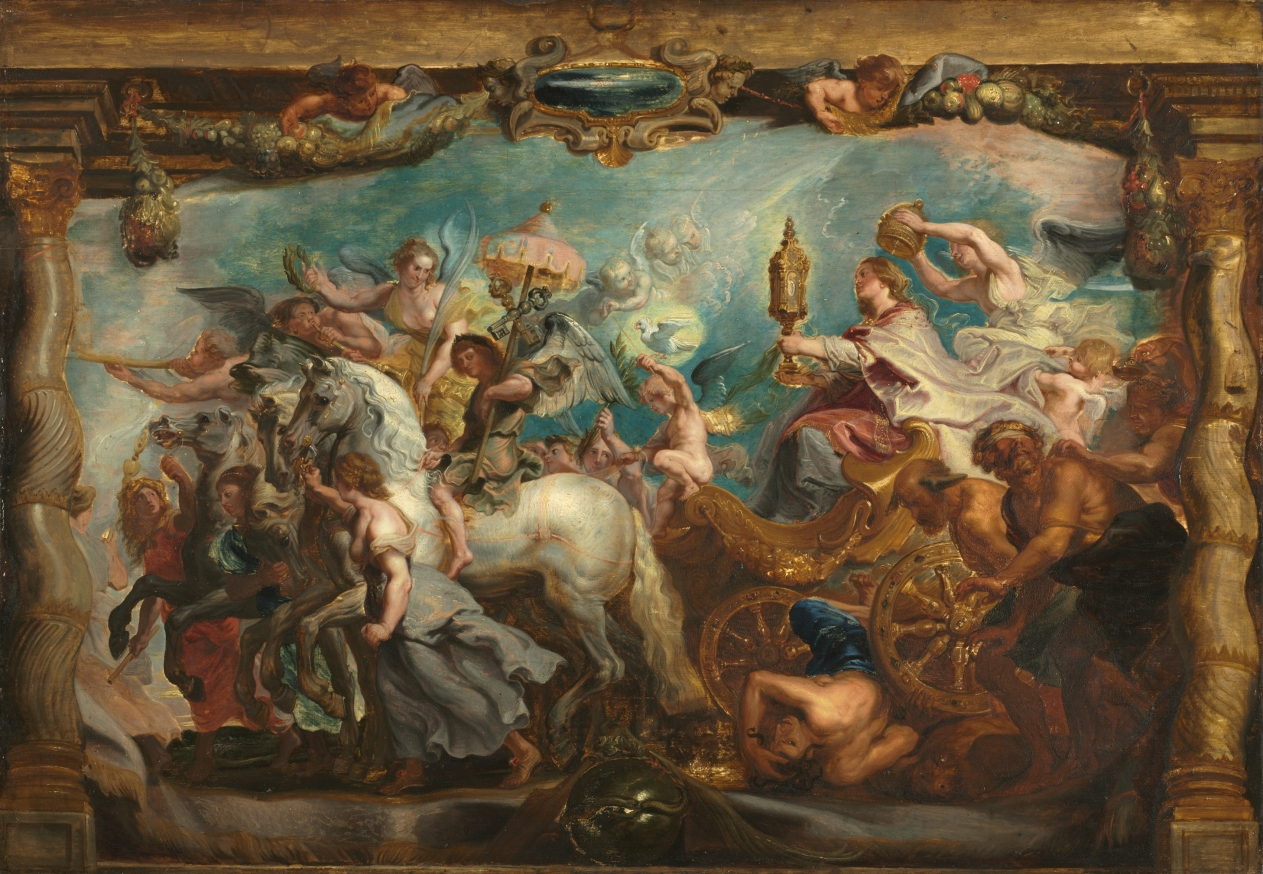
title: The Triumph of the Church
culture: Flanders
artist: follower of Peter Paul Rubens (Flemish, 1577–1640)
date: after 1628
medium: oil on wood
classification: Painting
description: This work is likely a copy after Rubens’s oil sketch for the Triumph of the Eucharist tapestry series. Isabella, daughter of King Phillip II of Spain, commissioned the tapestries for a royal monastery in Madrid. The finished tapestries still hang there today, and the original oil sketch is in the Museo del Prado, Madrid.